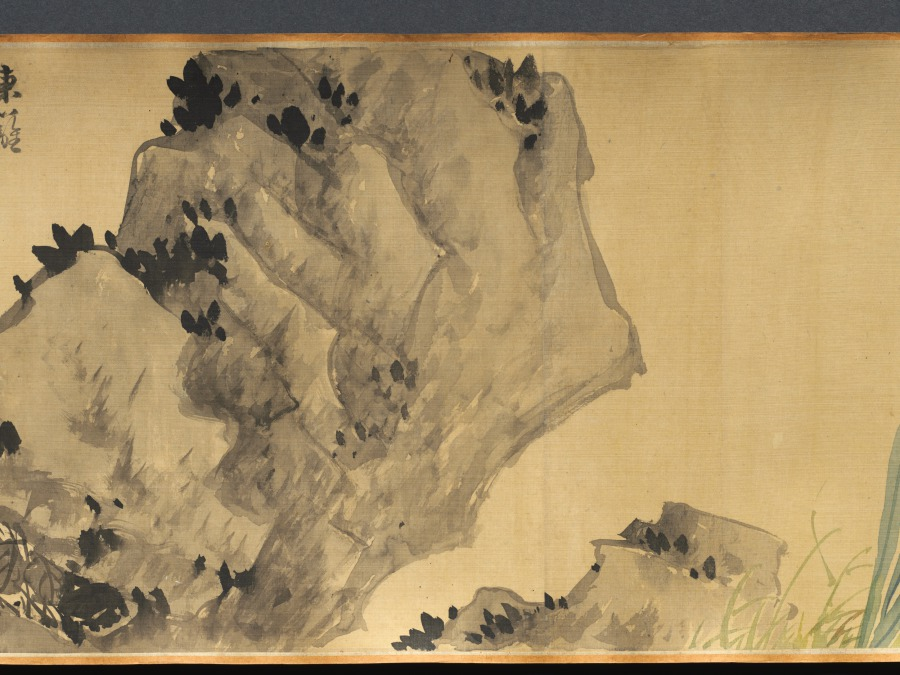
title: Flowers of Four Seasons, with Poems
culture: China, Ming dynasty (1368–1644)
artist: Wang Guxiang (Chinese, 1501–1568)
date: 1531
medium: handscroll; ink and light color on silk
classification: Painting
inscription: Artist's inscription, signature, and 15 seals. Ink Orchids. Sewn as pendants for the man of worth, swaying quiety, fragrance in the valley. [seal] Hsiao-chu ts'un Peony. Wiping his face, the young gentleman Ho [Ho Yen of Wei, Three Kingdoms] appears to have been powdered. His previous life was the perfume-stealing Han Shou [of Chin, 265–419 CE], the fragrance still lingers. [seal] Ts'un-wu chai. Flowering Crab Apple, New Bamboo. Shao-lin [Du Fu, 712–770] had to put down his brush. [Flowering Crab Apple]. Yü-k'o [Wen T'ung, d. 1079) in vain wrote poems about [Bamboo]. [seal] Yu-shih. Lotus Flowers. When she turns her head, half-hidden by a fan, and casts a glance, all the beautiful women become colorless. [seal] K'ang yüeh huai. Loquat. Ripeness in summer. [seal] Lu-chih. Pomegranate Flower. Whenever I remember you I will send my thoughts, but where have you gone--the [skirt] of pomegranate red? [seal] Wu-ho Sheng. Day Lily. Plant the day lily to forget sorrow. [seal] Yu-shih. Chrysanthemum. The untrammelled joy at the eastern fence. [seal] Lu-chih. Begonia. Comparing it to the beauties of Spring, and spreading them out as trimming for the stone steps. [seal] Yu-shih. Hibiscus. In recent years I have always enjoyed looking at flowers; instead of dark red I preferred pink ones. [seal] Jen-sheng i-lou. Narcissus, Camellia. The jade girdle left behind at Lo River. [Narcissus]. The precious pearls glitter before Spring. [Camellia]. [seal] Lu-chih. Heavenly Bamboo (Nandina domestica). A single branch in the wintry season. [seal] K'ang yüeh huai. Plum. Fragrant snow in the Lo-fou Mountains. [seal] Ts'un-wu chai. In the eleventh lunar month of the hsin-mao year of the Jiaqing era [1531], [I] imitated the boneless style of Yüan masters in sketching from life. Guxiang [seals] Yu-shih; Lu-chih. Translated by Wai-kam Ho/Lingyun Shih Liu (1980)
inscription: 2 colophons and 23 additional seals: 1 colophon dated 1632, and 2 seals of Li Jih-hua [Li Rihua] 李日華 (1565–1635); 1 colophon and 2 seals of Xiang Shengmo 項聖謨 (1597–1658); 3 seals of Liang Qingbiao 梁清標 (1620–1691); 6 seals of the Jiaqing 嘉慶 emperor (r. 1796–1820); 9 seals of Ch'eng Ch'i [Cheng Qi] 程琦 (1911–1988)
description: In this painting, flowers are loosely arranged by the seasons: narcissus and peony represent early spring; yellow loquat and lotus, summer; chrysanthemum, autumn; and the plum and evergreen bamboo, winter. The artist added to each flower a poetic line of calligraphy associating each plant with a historic or legendary figure. For example, the chrysanthemum, along with the line “The untrammeled joy at the eastern fence,” refers to the poet Tao Yuanming (died AD 427) who enjoyed chrysanthemums at the eastern fence in his garden. The scroll illustrates Wang Guxiang’s mastery of free brushwork, combining light monochrome ink with transparent colors. In his inscription, Wang says he used the “boneless” style without outlines as developed during the Yuan dynasty (1279–1368). Wang was a native of Changzhou, a city in southeast China known for its rich flora and fauna, and flower-and-bird painting tradition.